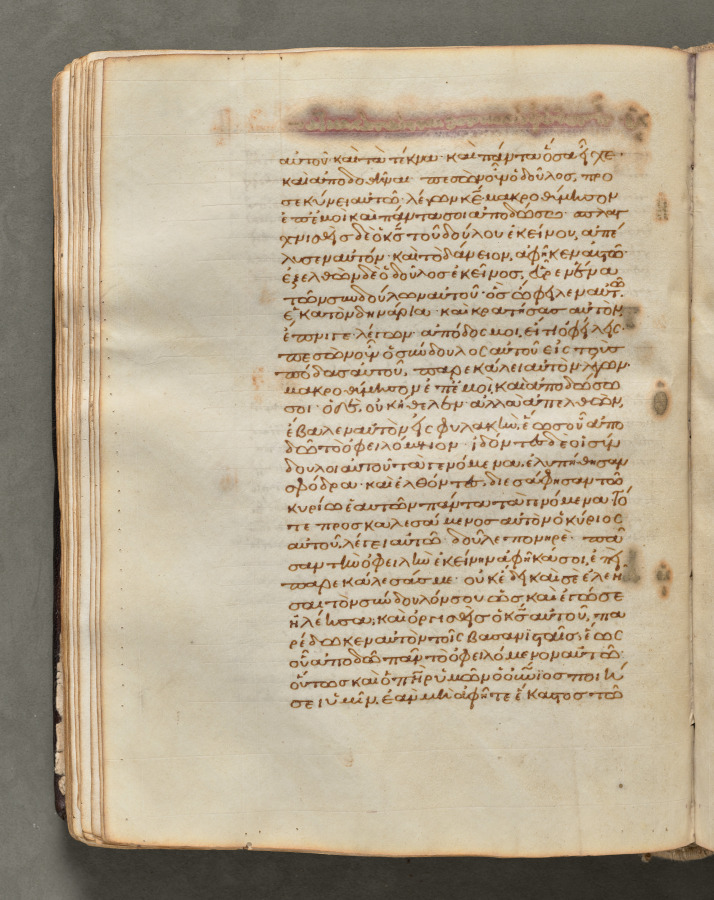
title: Text, folio 82 (verso), from a Gospel Book with Commentaries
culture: Byzantium, Constantinople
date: c. 1000–1100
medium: ink, tempera, and gold on vellum; leather binding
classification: Bound Volume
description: Each of the four gospels in this book opens on a page with brilliantly illuminated borders depicting the author of the text as well as birds-principally peacocks, symbols of the immortality of the soul-and fountains, representing the fountain of life and the salvation of the soul. This volume consists of 428 leaves with texts in Greek. Its level of sophistication suggests that it was probably written and decorated in a monastery in Constantinople.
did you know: Gospel Books were carried in procession through Byzantine churches.